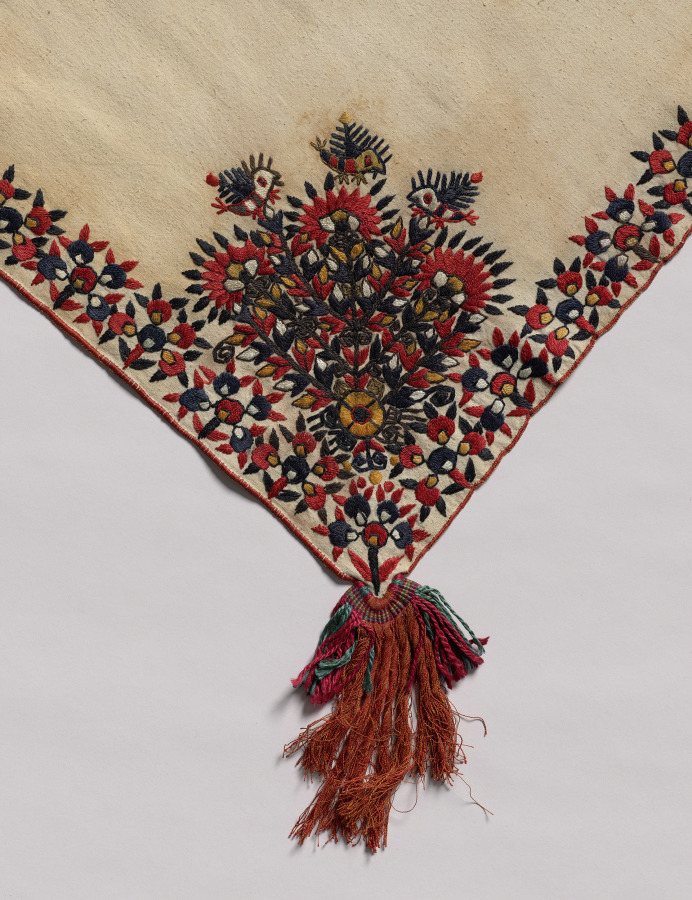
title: Furnishing textile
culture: Africa, North Africa, Algeria, Algerian embroiderer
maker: Algerian Embroiderer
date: 1800s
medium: Linen, silk, dye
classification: Embroidery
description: This textile is woven using undyed linen in a technique called a tabby weave. The artist then used red, blue, white, and ochre yellow silk threads to create embroidered floral borders and designs in each corner, topped with several birds. The style of these motifs also strongly resembles Turkish embroideries made in this period.